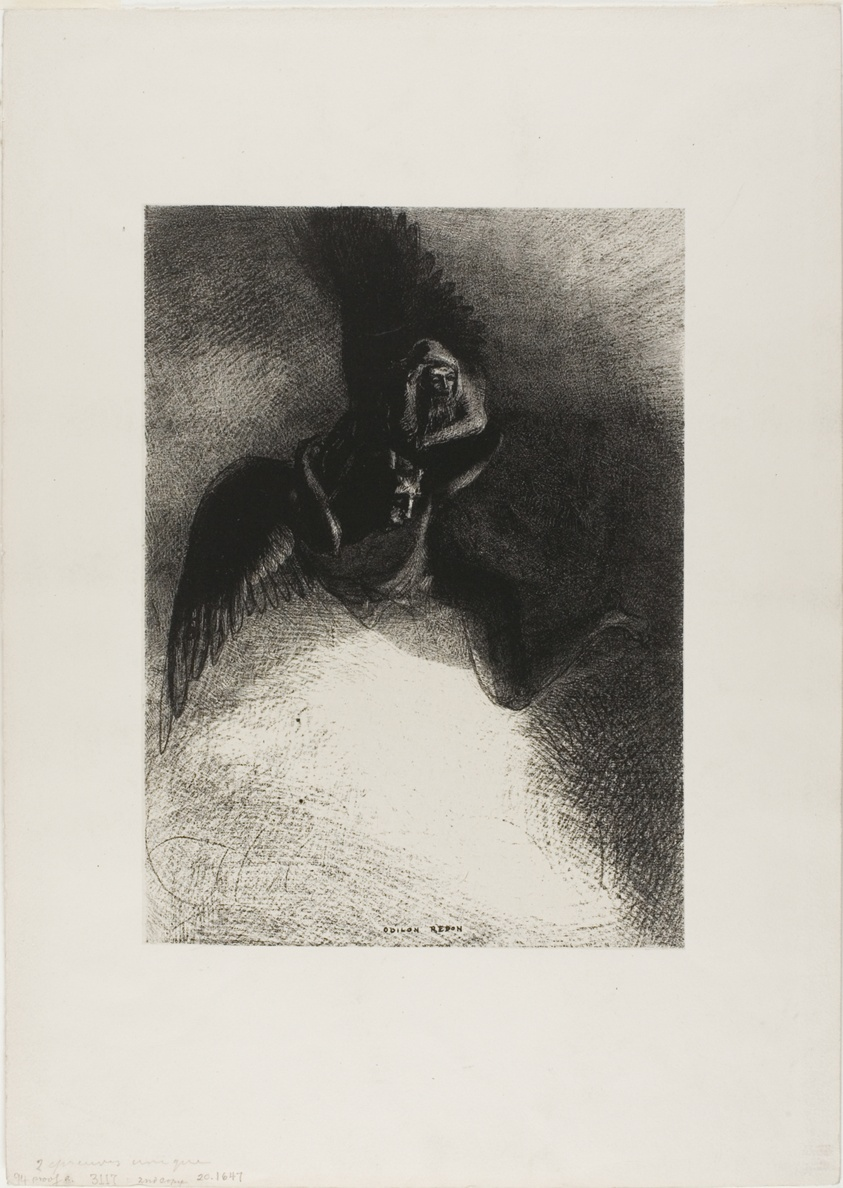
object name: Print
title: Frontispiece to A Gustave Flaubert (To Gustave Flaubert)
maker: Odilon Redon (French, 1840-1916)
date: 1889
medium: Lithograph in black on cream China paper laid down on ivory wove paper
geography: France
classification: lithograph; print; prints and drawing; paper